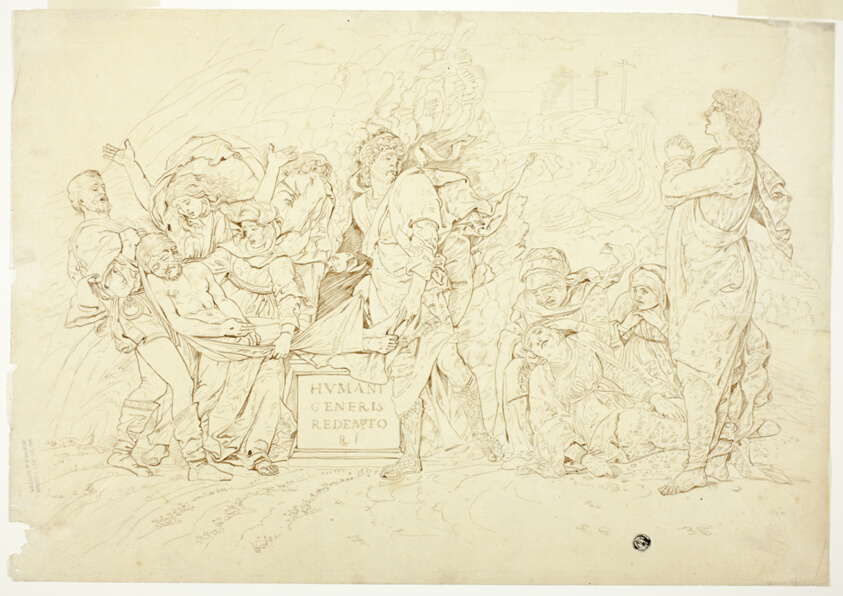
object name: Drawing and Watercolor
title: The Entombment of Christ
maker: Andrea Mantegna, after; Italian, 1431-1506; [1465/1475]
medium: Pen and brown ink on cream tracing paper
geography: Italy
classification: pen and ink drawings; drawings (visual works); prints and drawing